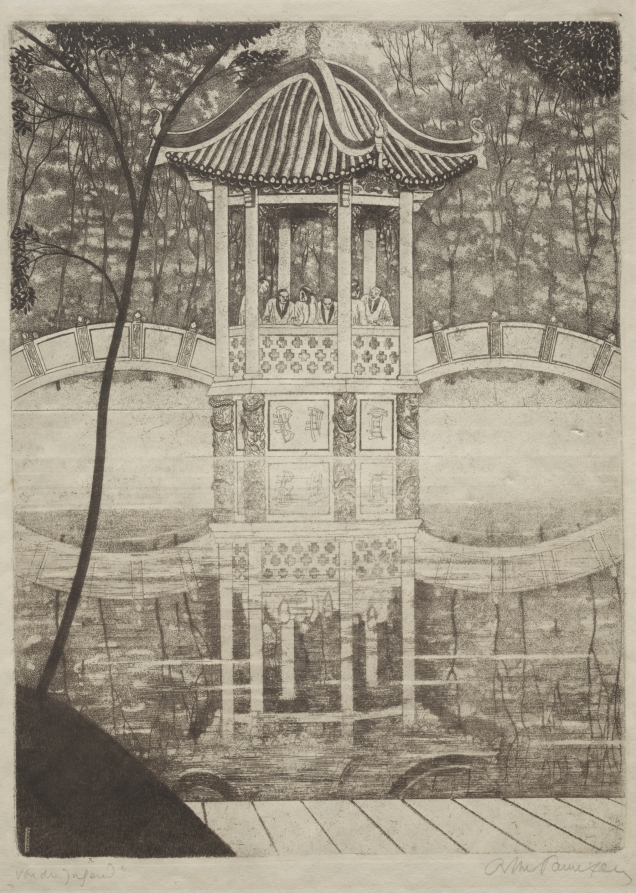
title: Untitled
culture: Austria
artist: Arthur Paunzen (Austrian)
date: 1900–1910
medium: etching and aquatint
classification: Print